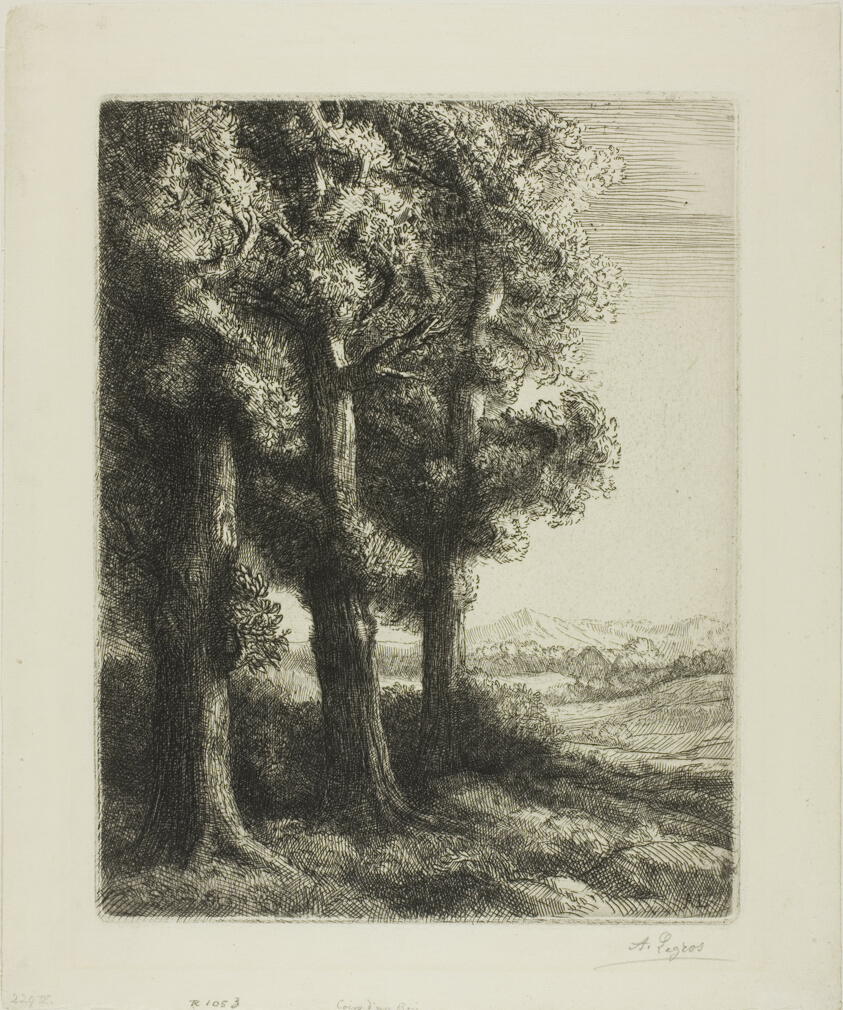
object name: Print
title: Edge of a Wood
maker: Alphonse Legros (French, 1837-1911)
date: c. 1860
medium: Etching and drypoint on ivory wove paper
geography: France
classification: etching; print; prints and drawing